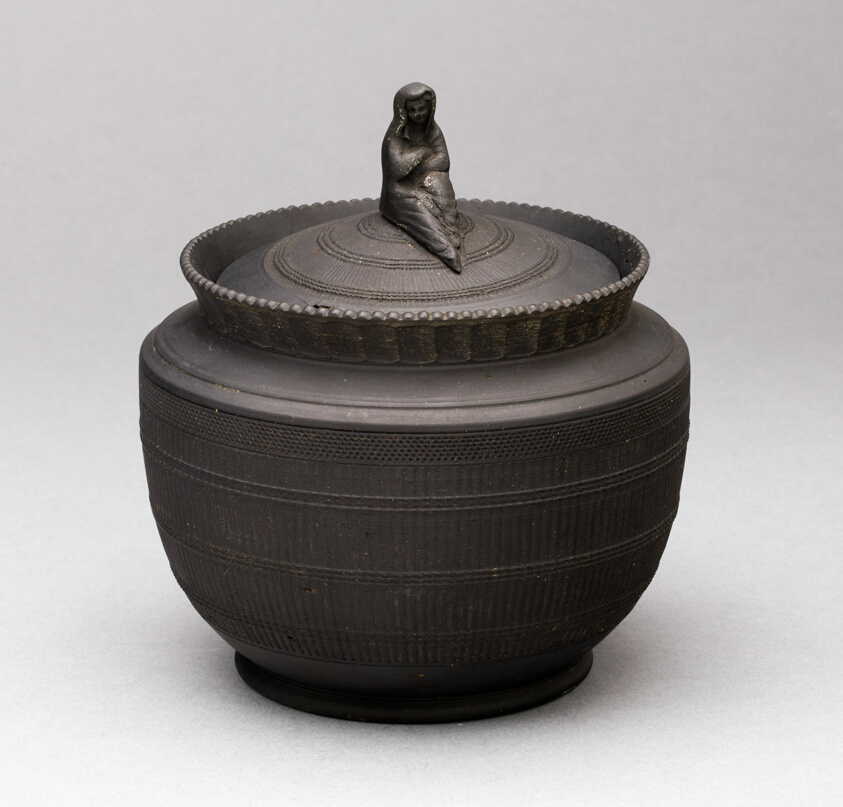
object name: Ceramics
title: Sugar Bowl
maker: Hackwood, Dimmock & Co.; English, 1807-1827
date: 1810/20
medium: Stoneware (basaltware)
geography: Hanley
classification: sugar bowl; teaware; stoneware; european decorative arts; ceramics